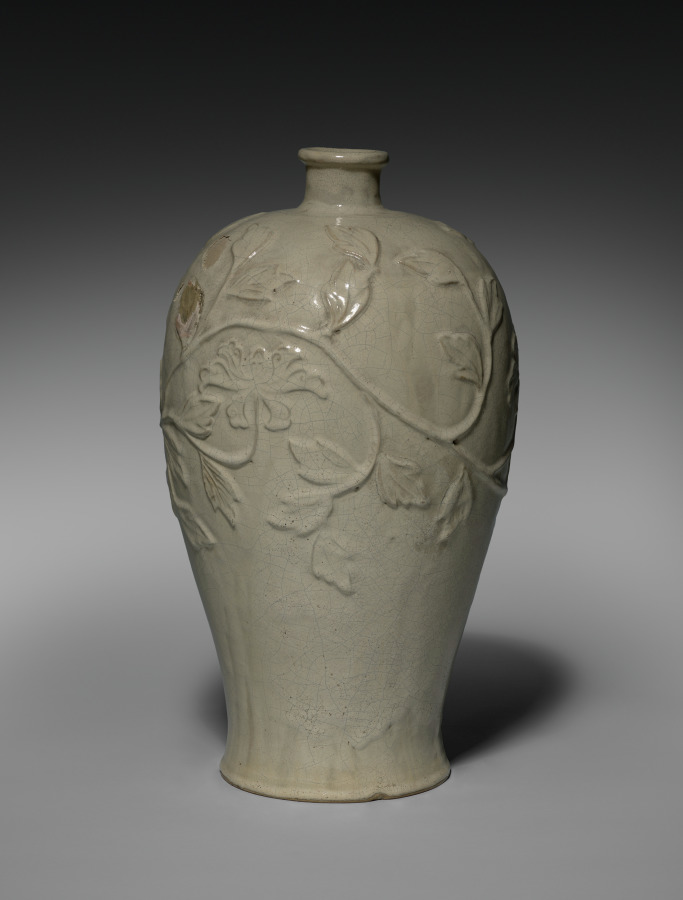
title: Jar: Kuang Tung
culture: China, Qing dynasty (1644-1911)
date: 1644–1911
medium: porcelain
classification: Ceramic